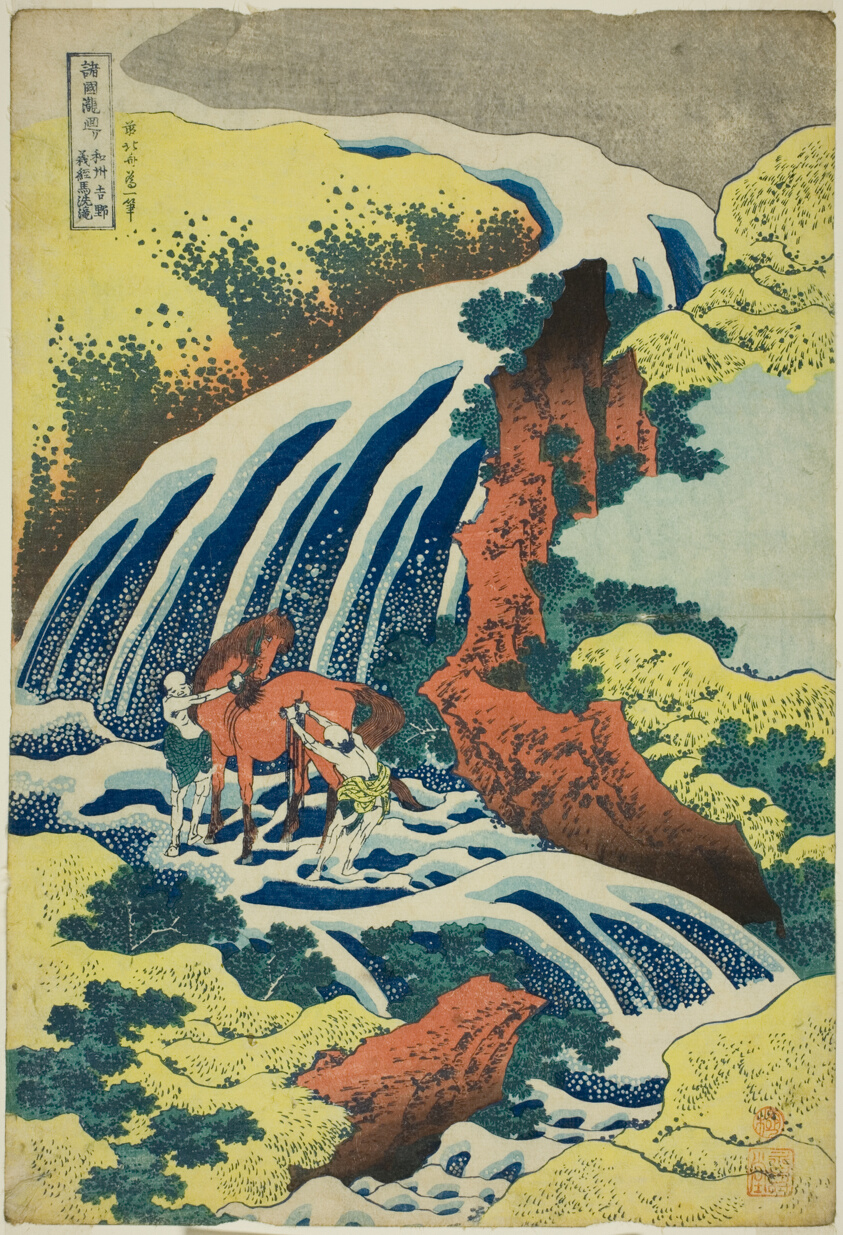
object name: Print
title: Yoshitsune’s Horse-Washing Falls at Yoshino in Yamato Province (Washū Yoshino Yoshitsune uma arai no taki), from the series Tour of the Waterfalls in Various Provinces (Shokoku taki meguri)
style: Japanese (culture or style)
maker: Katsushika Hokusai 葛飾 北斎; Japanese, 1760-1849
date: About 1833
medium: Color woodblock print; ōban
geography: Japan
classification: woodblock print; print; asian art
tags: landscapes